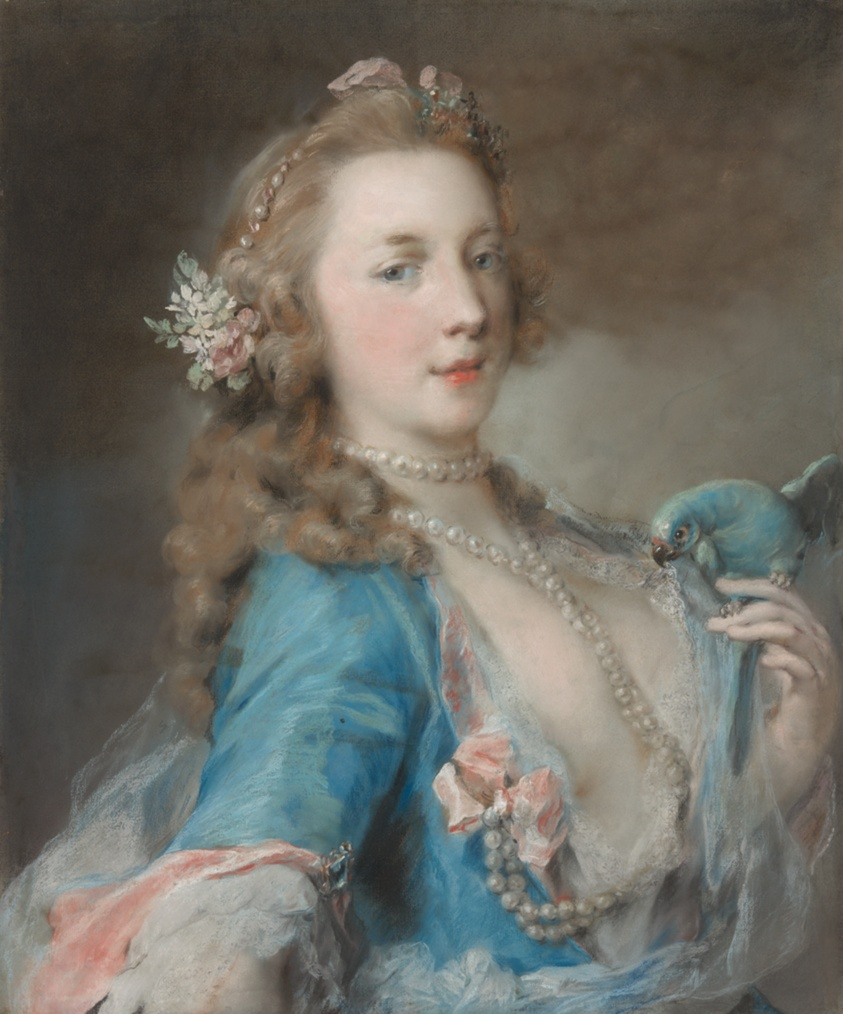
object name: Drawing and Watercolor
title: A Young Lady with a Parrot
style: Rococo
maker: Rosalba Carriera (Italian, 1673-1757)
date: c. 1730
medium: Pastel on blue laid paper, mounted on laminated paper board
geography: Venice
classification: pastel; drawings (visual works); prints and drawing; paper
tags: women, pearls, jewelry, French, fabric, hairstyles, pink (color), blue (color), flowers, birds, parrots, fashion, animals